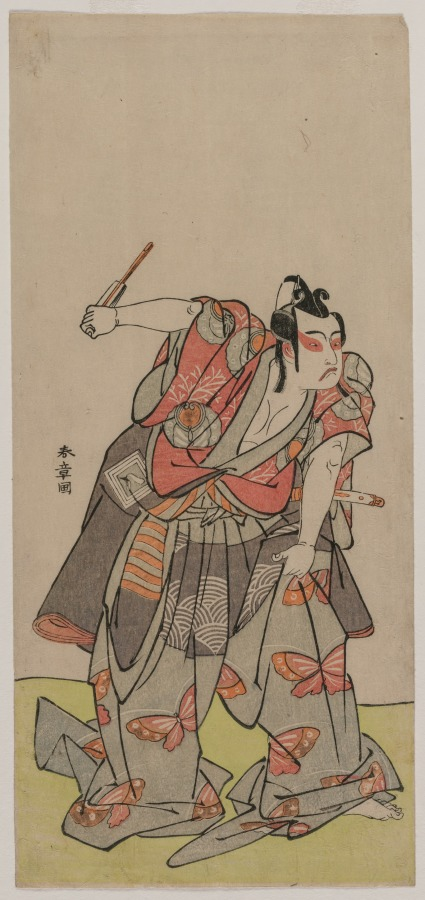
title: Ichikawa Yaozo II as Soga no Goro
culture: Japan, Edo period (1615–1868)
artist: Katsukawa Shunshō (Japanese, 1726–1792)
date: mid 1770s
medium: color woodblock print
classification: Print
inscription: Signature: Shunsho ga